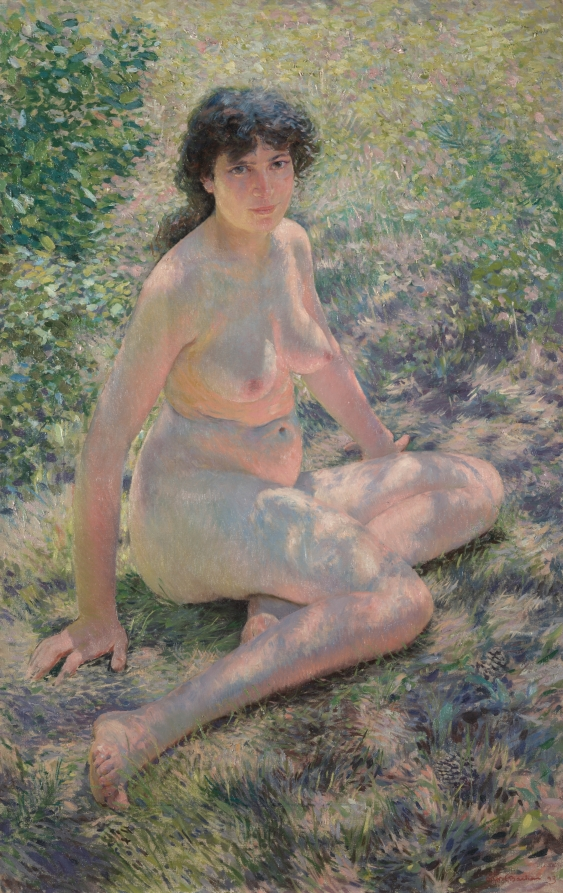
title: July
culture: America, Ohio, Cleveland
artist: Otto H. Bacher (American, 1856–1909)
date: 1893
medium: oil on canvas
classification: Painting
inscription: signed lower right: Otto H. Bacher 93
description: Cleveland-born and New York City-based Otto Bacher painted July during a visit to East Hampton, Long Island, NY. The sun-dazzled composition features a nude model seated upon a lawn. Her name was not recorded.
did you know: Several decades ago, a man stole a truck transporting this painting, but he was apprehended by police approximately seven minutes later.